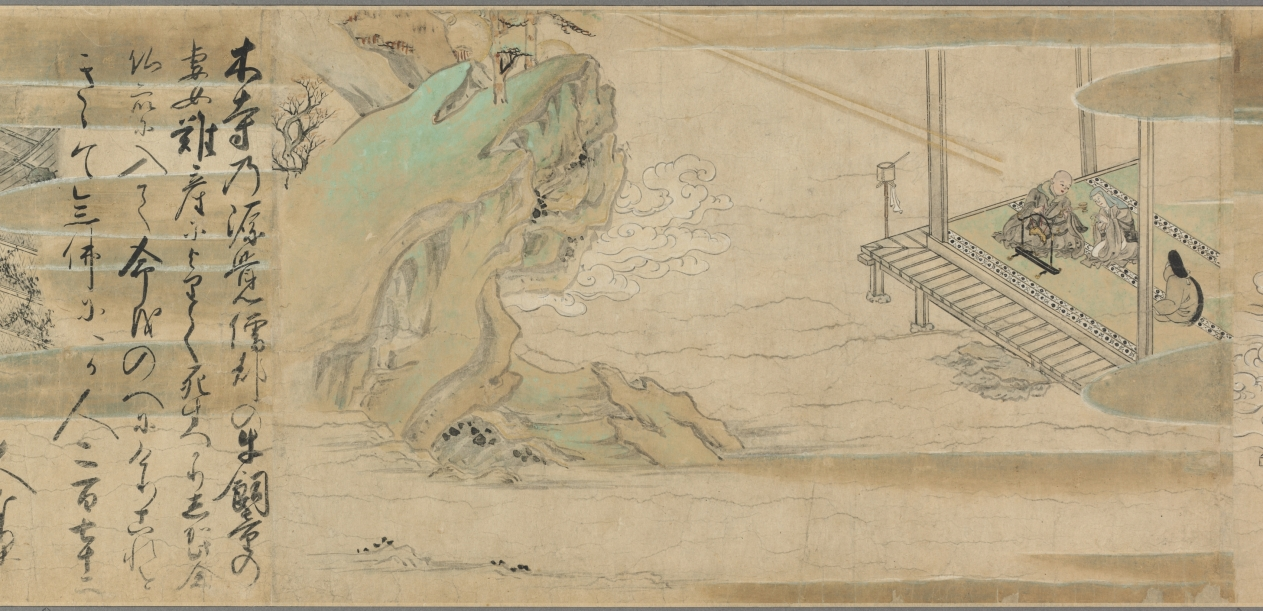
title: The Illustrated Miraculous Origins of the Yūzū Nenbutsu School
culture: Japan, Kamakura period (1185–1333)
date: early 1300s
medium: Handscroll; ink, color, and gold on paper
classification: Painting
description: This painting is the second of a set of two illustrated handscrolls. The first scroll depicts the biography of the Japanese Buddhist monk Ryōnin. This scroll begins with scenes of Ryōnin’s death and relates episodes illustrating the efficacy of following his teachings. Ryōnin asserted the total interconnectedness of all things and the spiritual benefit of chanting the name of the Buddha Amida for one another.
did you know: The other scroll from this two-scroll set belongs to the Art Institute of Chicago.